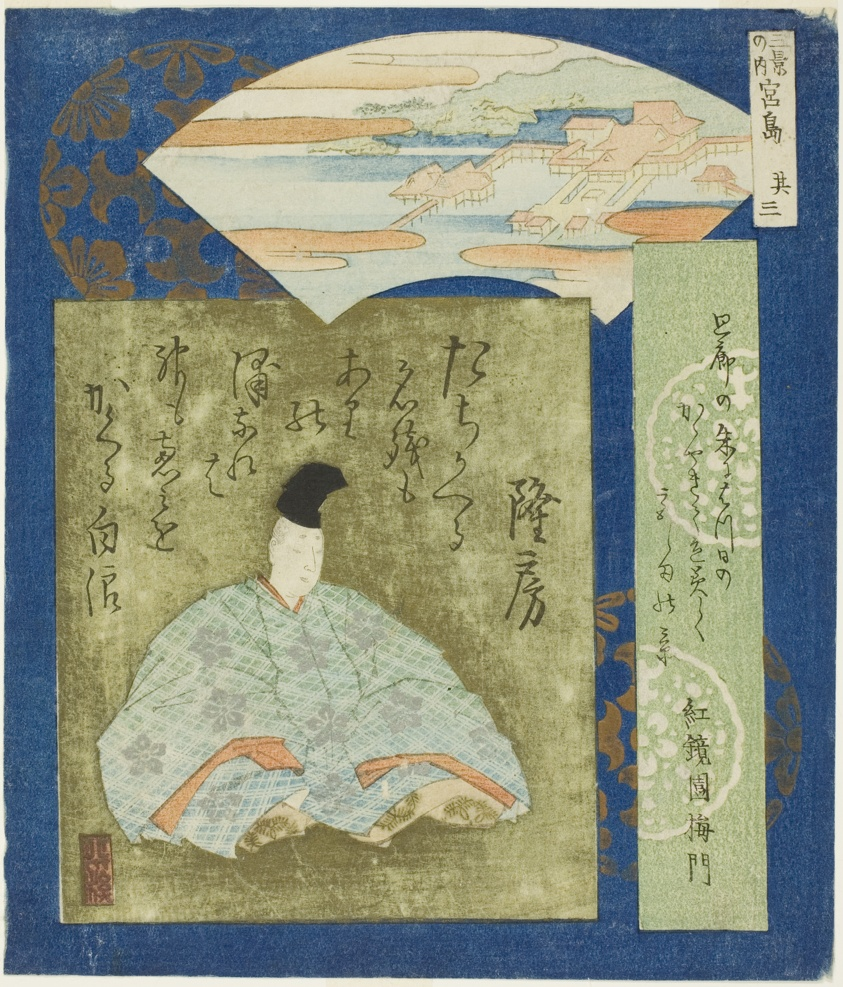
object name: Print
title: Miyajima: Takafusa, No. 3 from "Three Famous Scenes (Sankei no uchi: Sono san)"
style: Japanese (culture or style)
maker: Totoya Hokkei (Japanese, 1780-1850)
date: c. 1833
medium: Color woodblock print; left sheet of shikishiban triptych (right: 1954.745, center: 1954.590), surimono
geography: Japan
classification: woodblock print; print; asian art